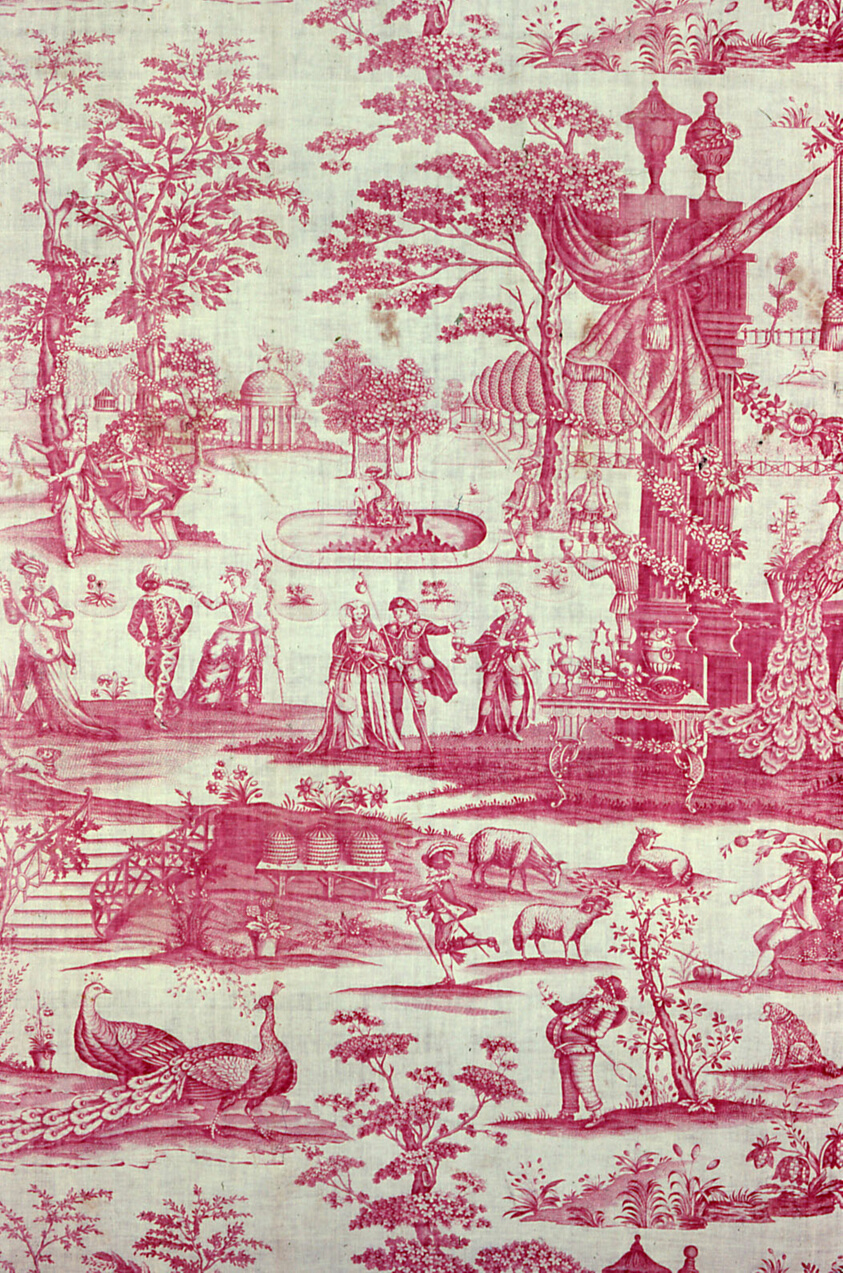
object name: Textile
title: Commedia del'Arte (Furnishing Fabric)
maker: England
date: after 1770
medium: Cotton; plain weave; copperplate printed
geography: England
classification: textile; weaving - printed; furnishing textile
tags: propaganda